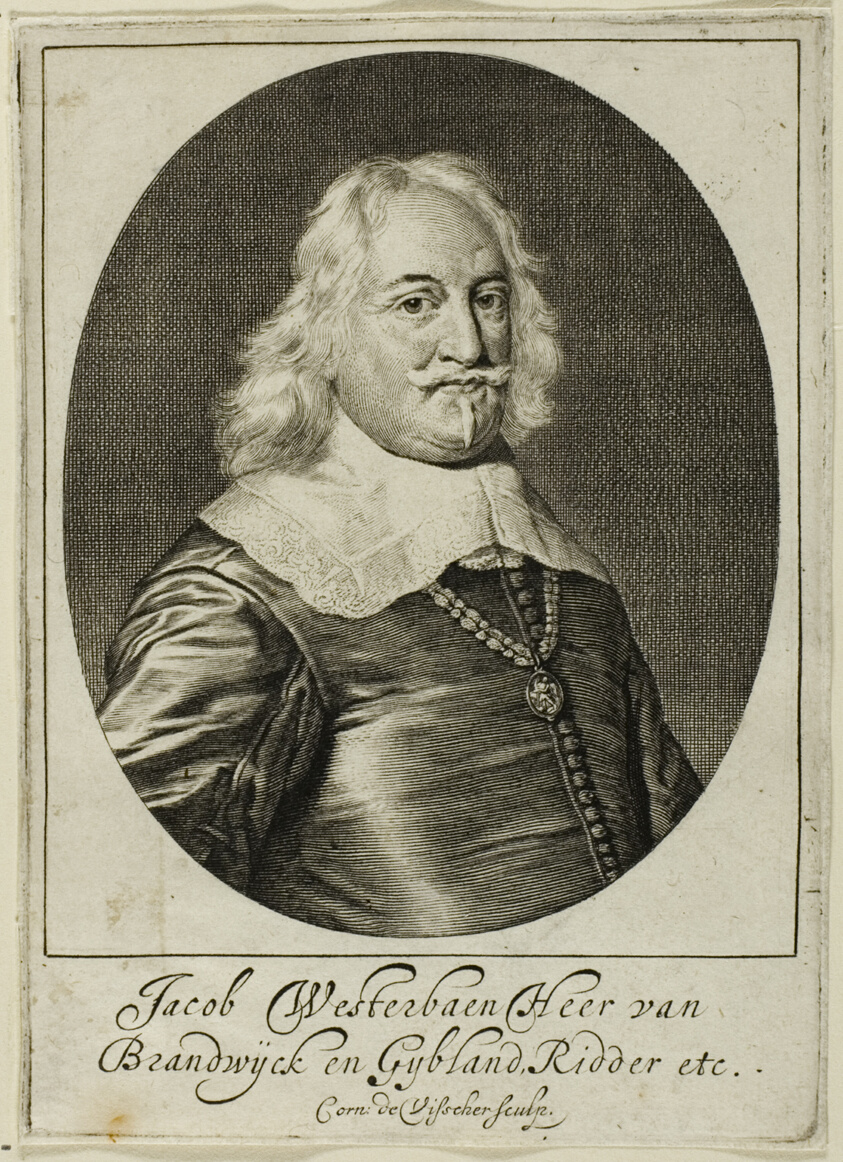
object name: Print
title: Jacob Westerbaen, lord of Brandwijk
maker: Cornelis Visscher (Dutch, c. 1629-1658)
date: c. 1649-58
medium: Engraving on ivory paper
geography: Holland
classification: engraving; print; prints and drawing